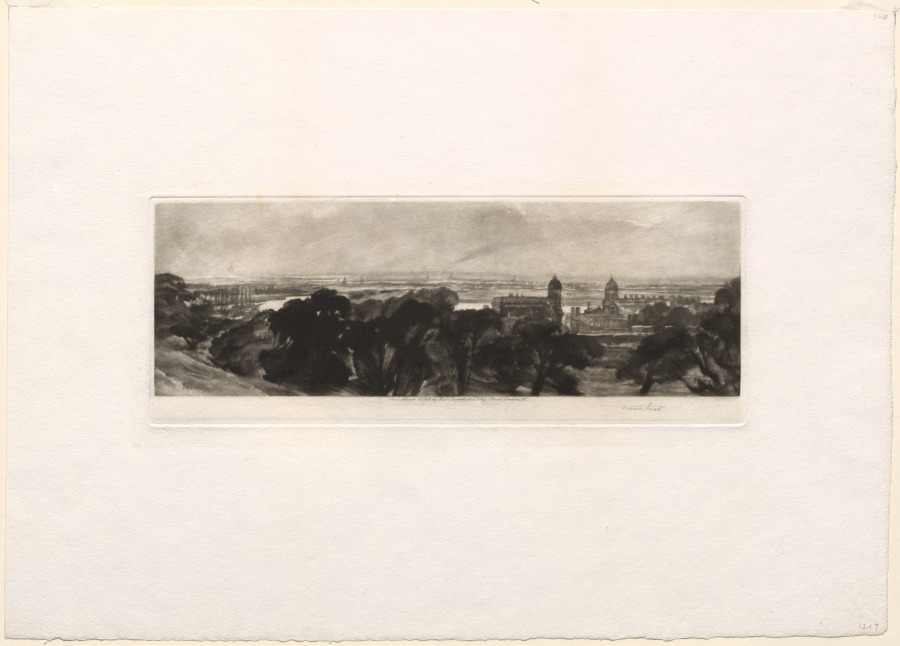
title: London from Greenwich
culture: England, 20th century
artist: Frank Short (British, 1857–1945)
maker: after Peter De Wint (British, 1784–1849)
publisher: Robert Dunthorne, London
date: 1904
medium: mezzotint on chine collé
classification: Print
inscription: Below image: ...Published March 11 1904 by Rob Dunthorne, 5, Vigo Street, London, W.; lower right, in graphite: Frank Short